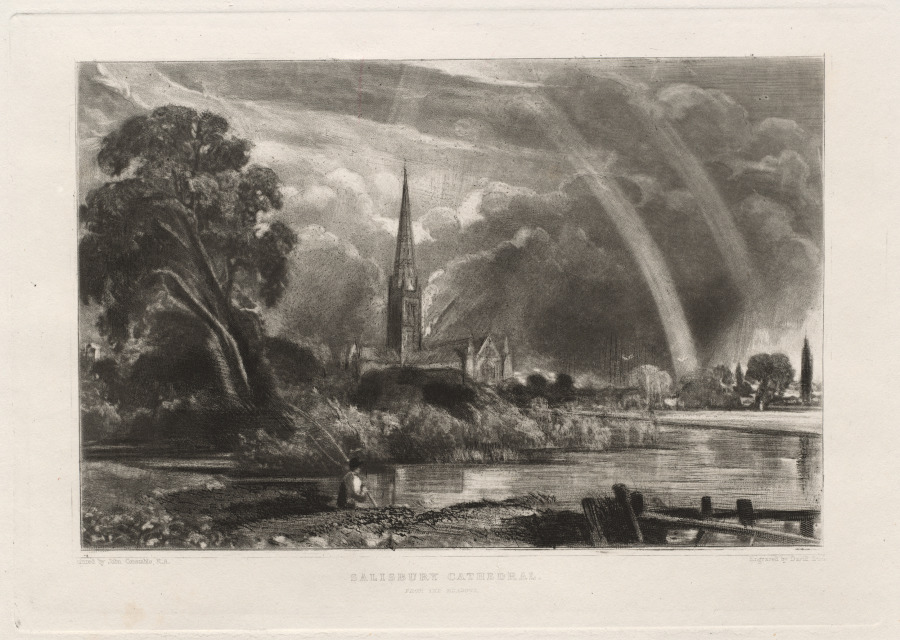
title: Salisbury Cathedral from the Meadows (Small Plate)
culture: England, 19th century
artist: David Lucas (British, 1802–1881)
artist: after John Constable (British, 1776–1837)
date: 1855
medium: etching and roulette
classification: Print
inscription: Lower left: Painted by John Constable, R.A.; below image: SALISBURY CATHEDRAL. / FROM THE MEADOWS.; lower right: Engraved by David Lucas